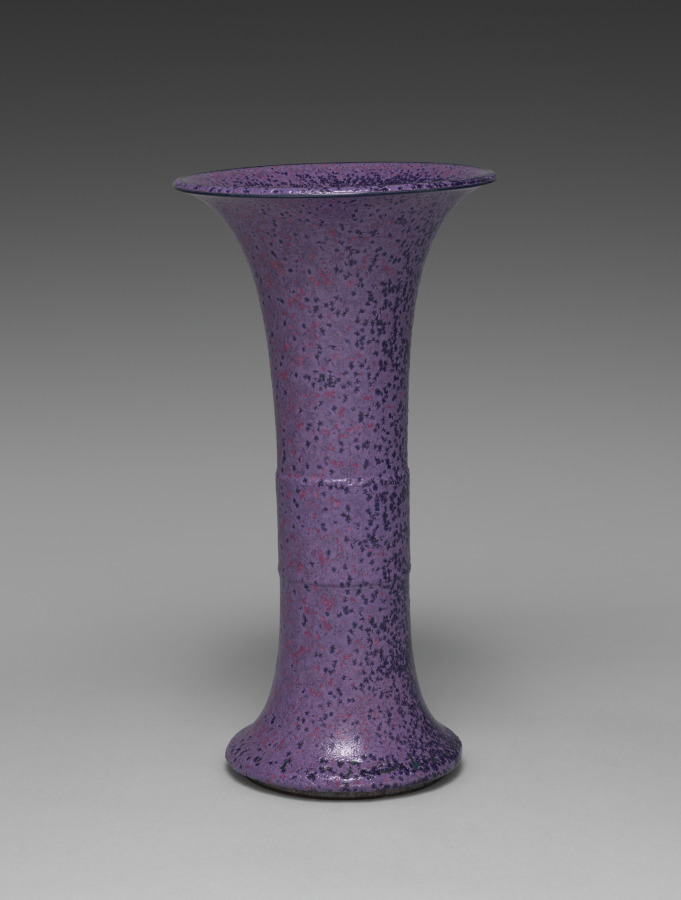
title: Gu-Shaped Vase with Patina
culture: Japan, Taishō period (1912–26) or Shōwa period (1926–89)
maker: Seifū Yohei IV (Japanese, 1872–1951)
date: 1914–46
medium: Porcelain with overglaze color enamel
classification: Ceramic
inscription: 清風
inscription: 成山清風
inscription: 清風造 【印】 清風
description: Yohei IV’s interest in bold, colorful designs is on full display in this purple gu-shaped vase. He not only exhibits his penchant for bold colors but also shows off a complex surface that suggests the patina on an ancient bronze. The body of the vase is a dark, greenish blue over which there is a thick application of color. While the predominant overlaid color is lavender purple, salmon pink and cornflower blue appear in places along with myriad nearly black forms, perhaps floating dandelion seeds or tiny flowers, scattered over the surface.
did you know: The glaze recalls in some respects a Chinese glaze named “snowflake blue,” or xuehualan (Japanese sekka’ai), a low-fired lead-fluxed glaze.